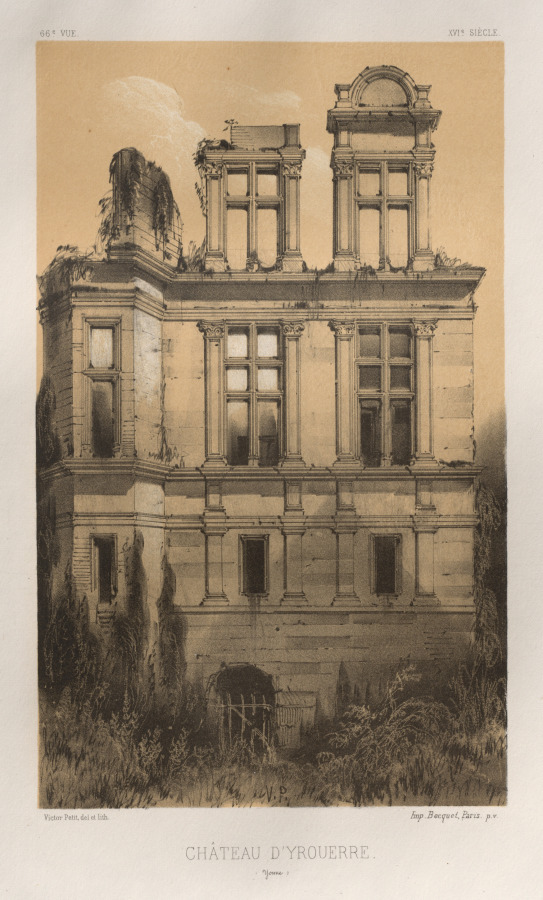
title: Architecture Pittoresque ou Monuments des XVeme. Et XVIeme. Siecles: Chateaux de France des XV et XVI Siecles: Pl. 66, Château D'Yrouerre (Yonne)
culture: France, 19th century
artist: Victor Petit (French, 1817–1874)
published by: Charles Boivin (publisher and editor); Lith de Godard a Paris (printer)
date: 1860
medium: lithograph with tint stone, from portfolio of 100 lithographs with tint stone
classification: Print